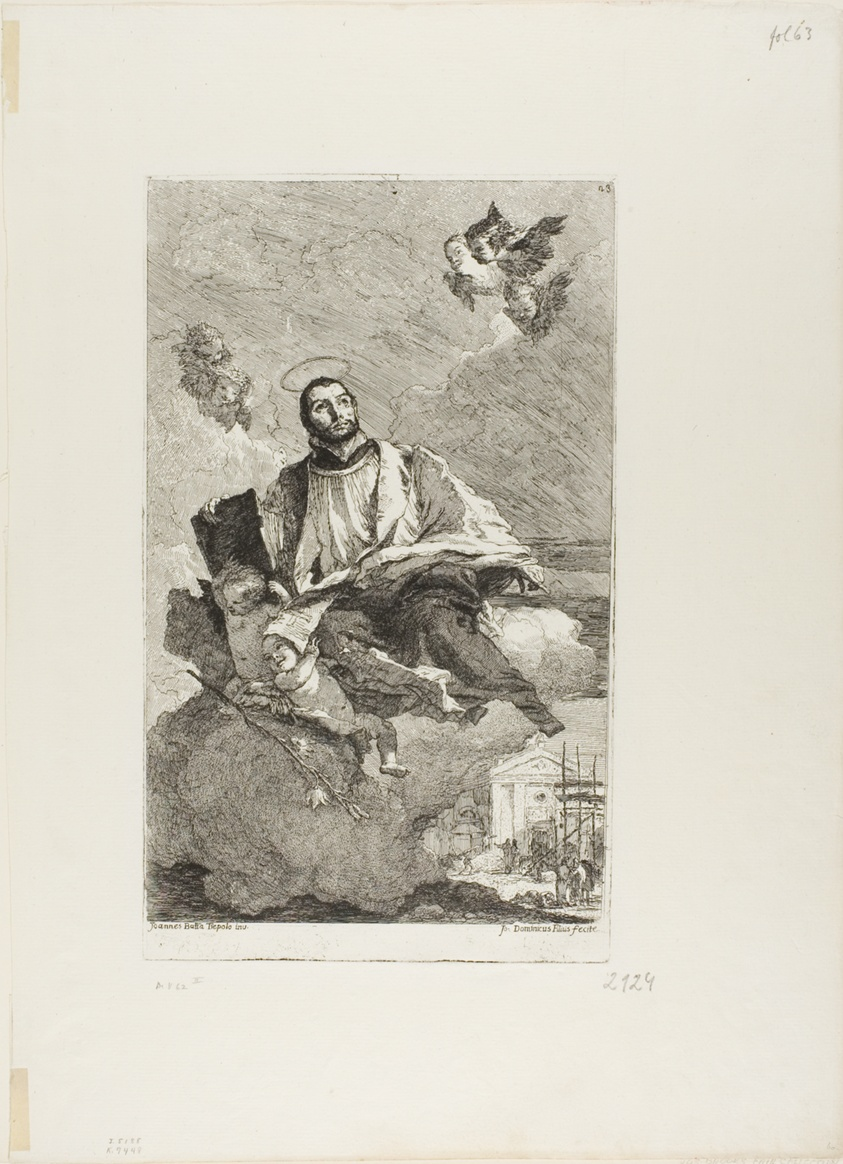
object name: Print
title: St. Gaetano of Thiene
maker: Giovanni Domenico Tiepolo (Italian, 1727-1804); after Giambattista Tiepolo (Italian, 1696-1770)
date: after 1757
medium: Etching on paper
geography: Italy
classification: etching; print; prints and drawing